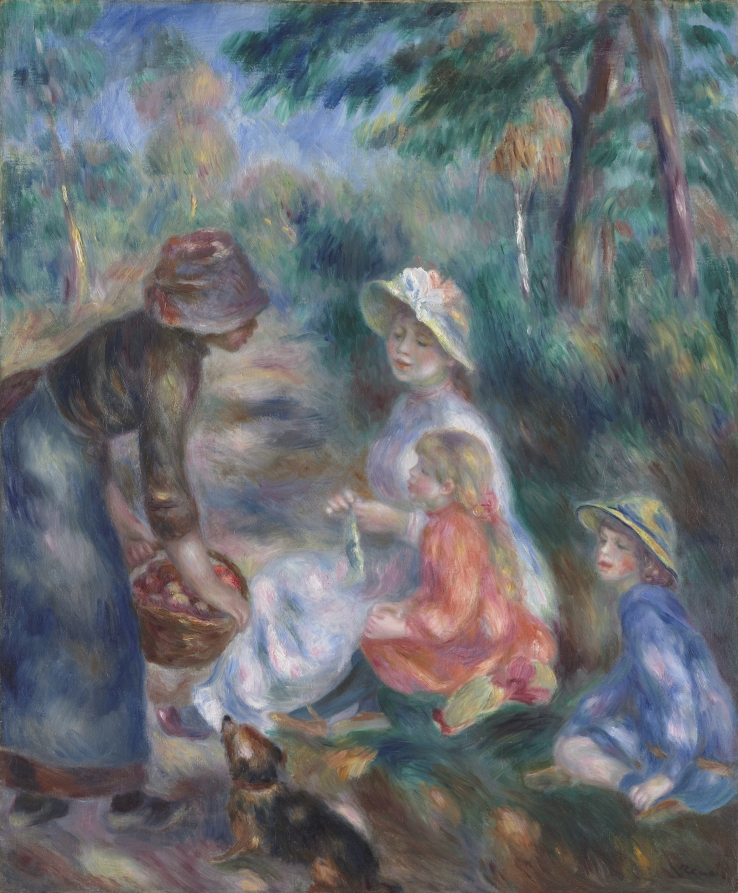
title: The Apple Seller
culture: France, 19th century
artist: Pierre-Auguste Renoir (French, 1841–1919)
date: c. 1890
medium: oil on fabric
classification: Painting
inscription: Signed center right: a. renoir / 1864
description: This painting depicts a young country girl offering apples to Renoir's wife, Aline. The boy in the straw hat may be the artist's nephew, Edmond, but the young girl with the ribbon in her hair has not been identified. Bathed in soft, dappled sunlight, the figures are united through the fluid brushstrokes that cover the canvas. The leaping dog provides an accent of humor and motion in an otherwise tranquil scene. The picture was probably completed at Essoyes, in eastern France.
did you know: Using repetitive, soft, light-of-touch brushstrokes to form patches of color, Renoir creates a sense of dappled light that reflects on the ground and caresses the figures, giving the painting an ethereal, dreamlike quality.